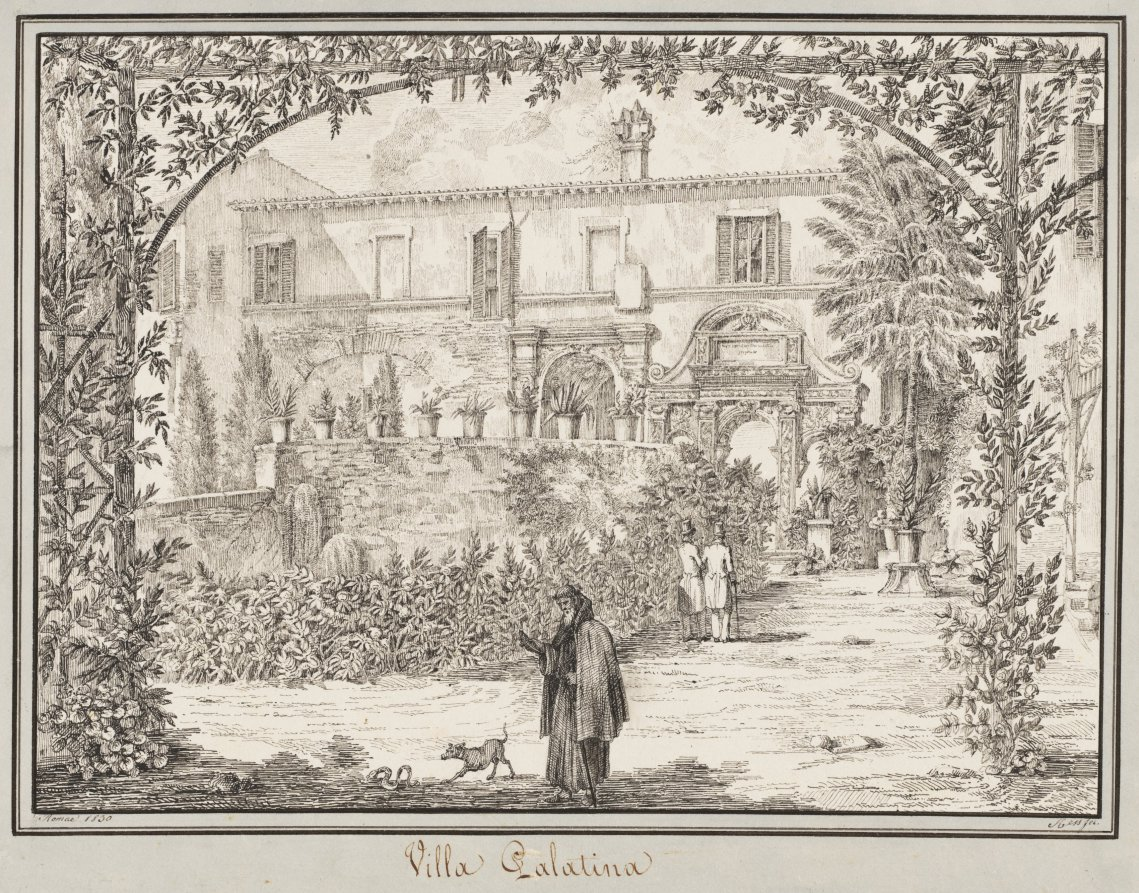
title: Villa Palatina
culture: Germany, 19th century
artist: Peter Heinrich Lambert von Hess (German, 1792–1871)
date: 1830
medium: pen and black ink with faint traces of graphite; framing lines in black ink, with gray wash border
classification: Drawing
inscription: signed, lower right, in gray ink: Hess fec. ; by artist, lower left, in gray ink: Romae 1830 ; [by artist?], lower center, in brown ink: Villa Palatina ; VERSO, upper center, in graphite: 39 x 32.5 [underlined] / 29 x 22.5 / 2 RIGHE